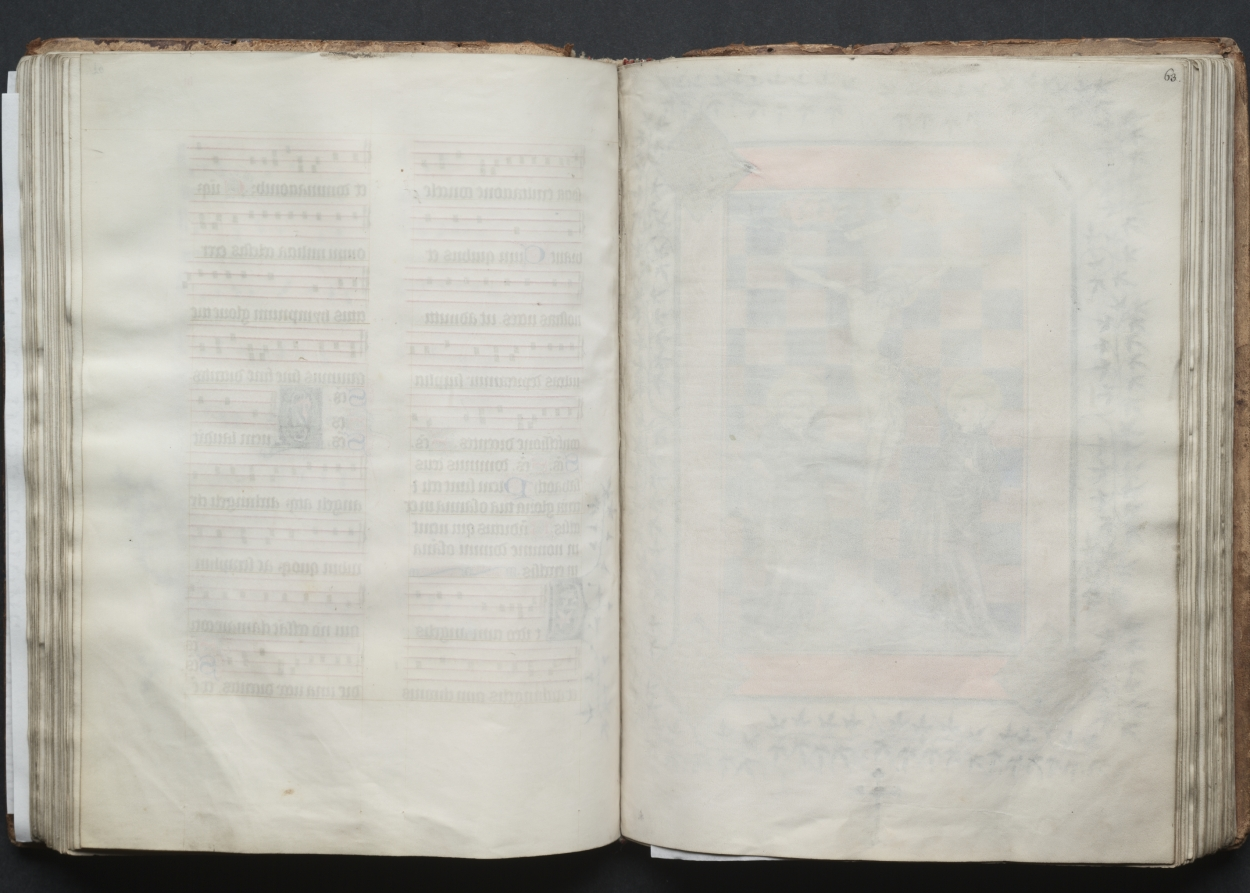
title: The Gotha Missal: Fol. 62v, Text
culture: France, Paris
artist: Master of the Boqueteaux (French)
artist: and Workshop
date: c. 1375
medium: ink, tempera, and gold on vellum; blind-tooled leather binding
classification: Bound Volume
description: The style and quality of this manuscript's decoration is typical of deluxe Parisian books made for aristocratic or royal patrons. Most of the book's decoration appears to be the work of the Master of the Boqueteaux, an artist active at the court of King Charles V (died 1380). His style was apparently shared by a number of book illuminators working in and around Paris. It is very possible that the Gotha Missal belonged to Charles V, but is not provable because the manuscript has no royal portraits and lacks a colophon. Given the book's magnificent decoration, however, it would seem that it was produced for a Valois prince, if not for the king himself. The manuscript receives its name from the German dukes of Gotha, its later owners.